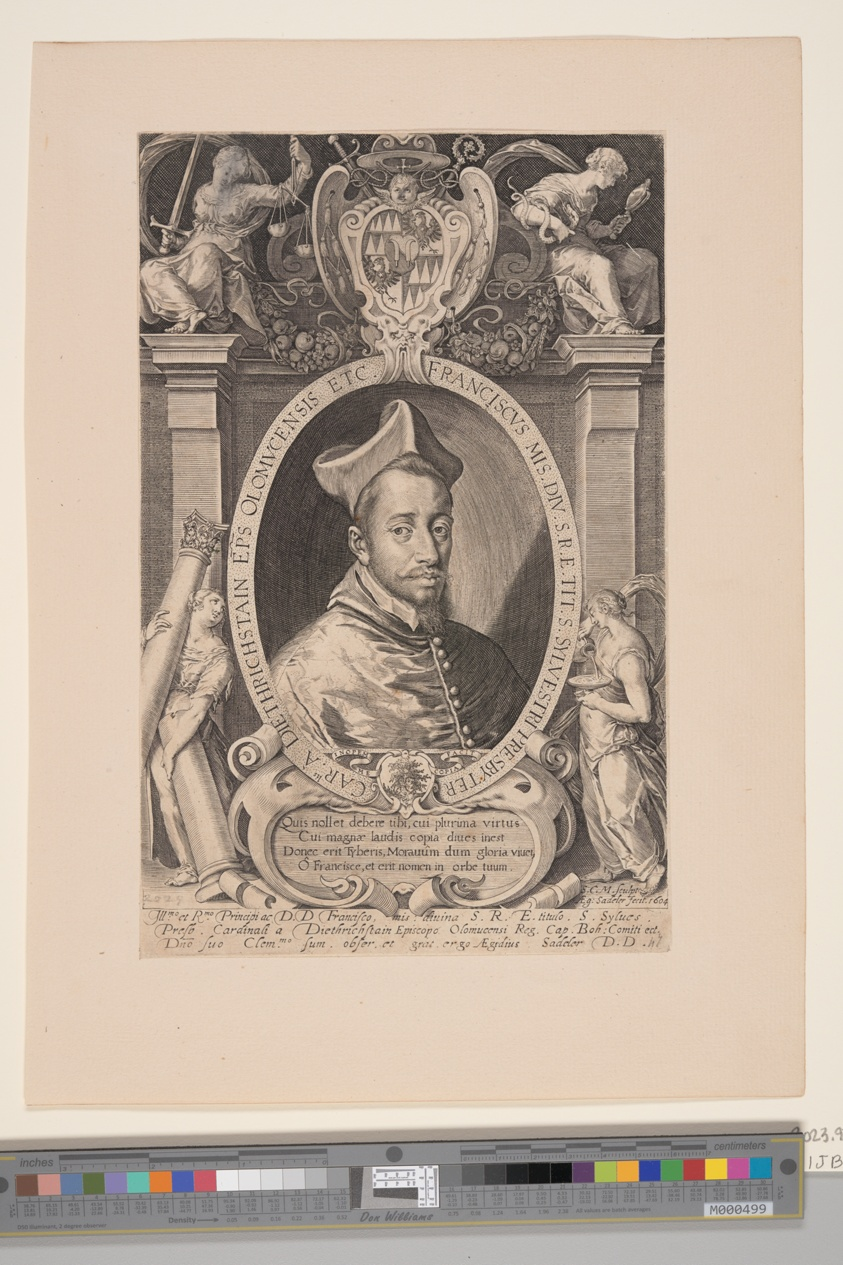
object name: Print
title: Franz von Dietrichstein, Bishop of Olmütz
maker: Aegidius Sadeler II; Flemish, c. 1570–1629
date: 1604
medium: Engraving on paper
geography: Flanders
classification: engraving; paper; print; prints and drawing